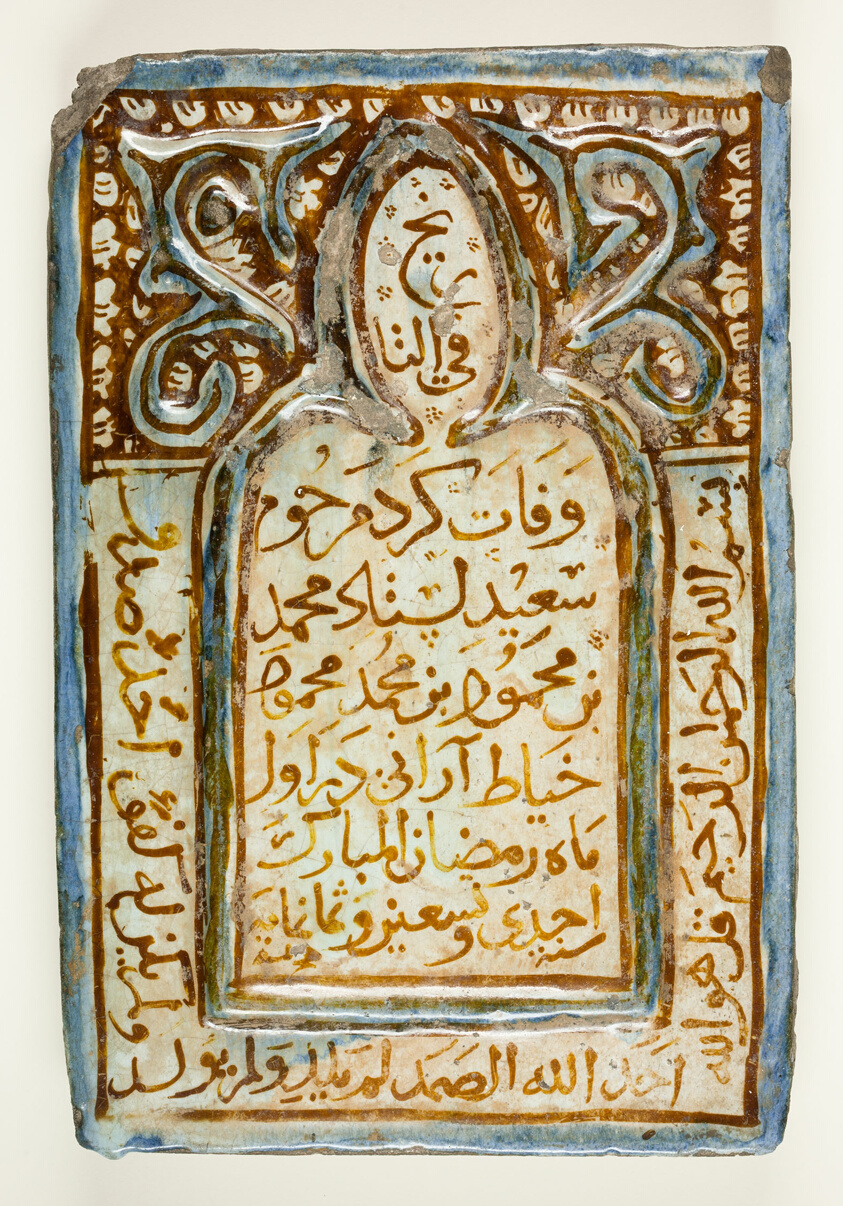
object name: Funerary Object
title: Tombstone Tile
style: Islamic (culture or style)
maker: Iran; Kashan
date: Timurid dynasty (ca. 1370–1507), dated 1486 (891 AH)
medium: Lusterware, fritware painted in luster and blue over an opaque white glaze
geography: Iran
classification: earthenware; asian art; ceramics; architectural fragment